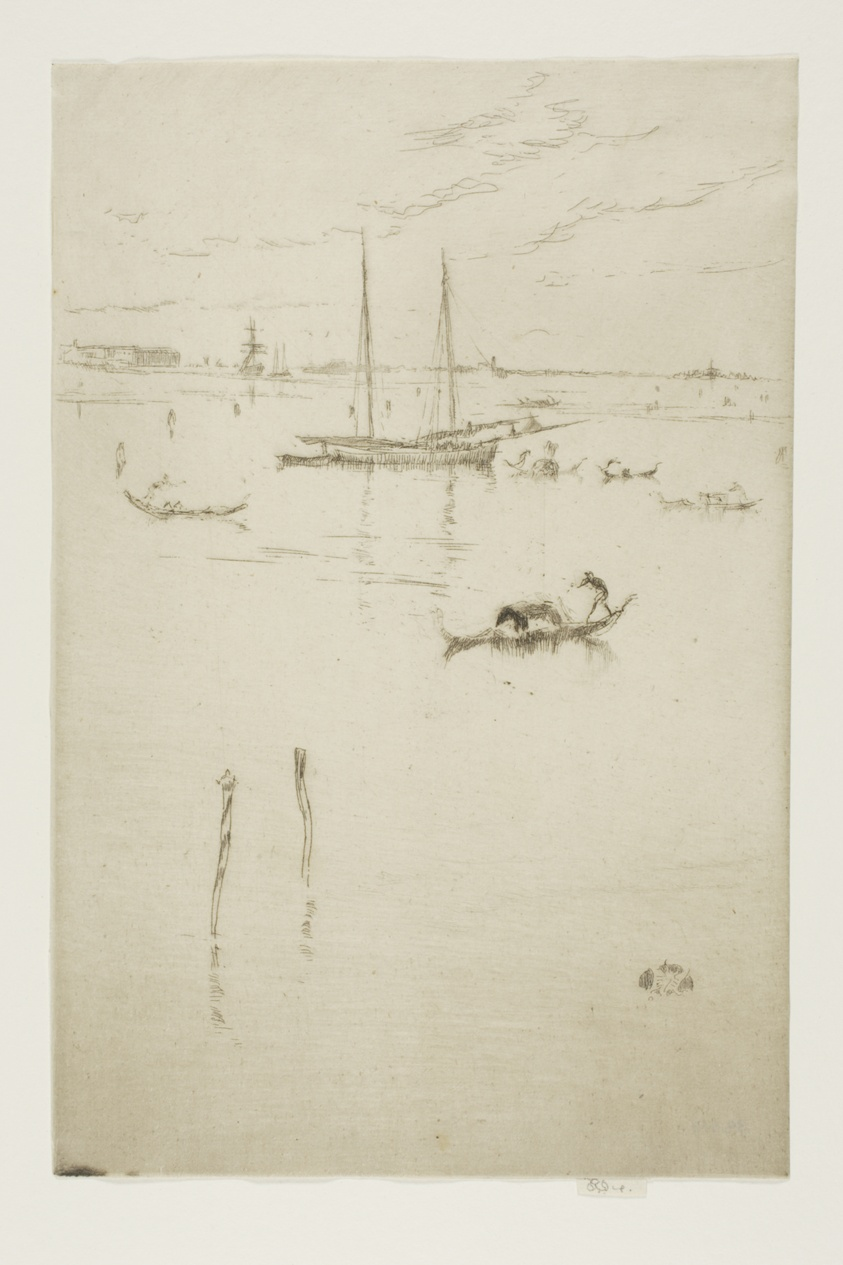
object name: Print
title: The Little Lagoon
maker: James McNeill Whistler (American, 1834-1903)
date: 1879/80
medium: Etching and drypoint with foul biting in black ink on cream laid paper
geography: United States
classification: etching; foul biting; print; prints and drawing; drypoint; paper